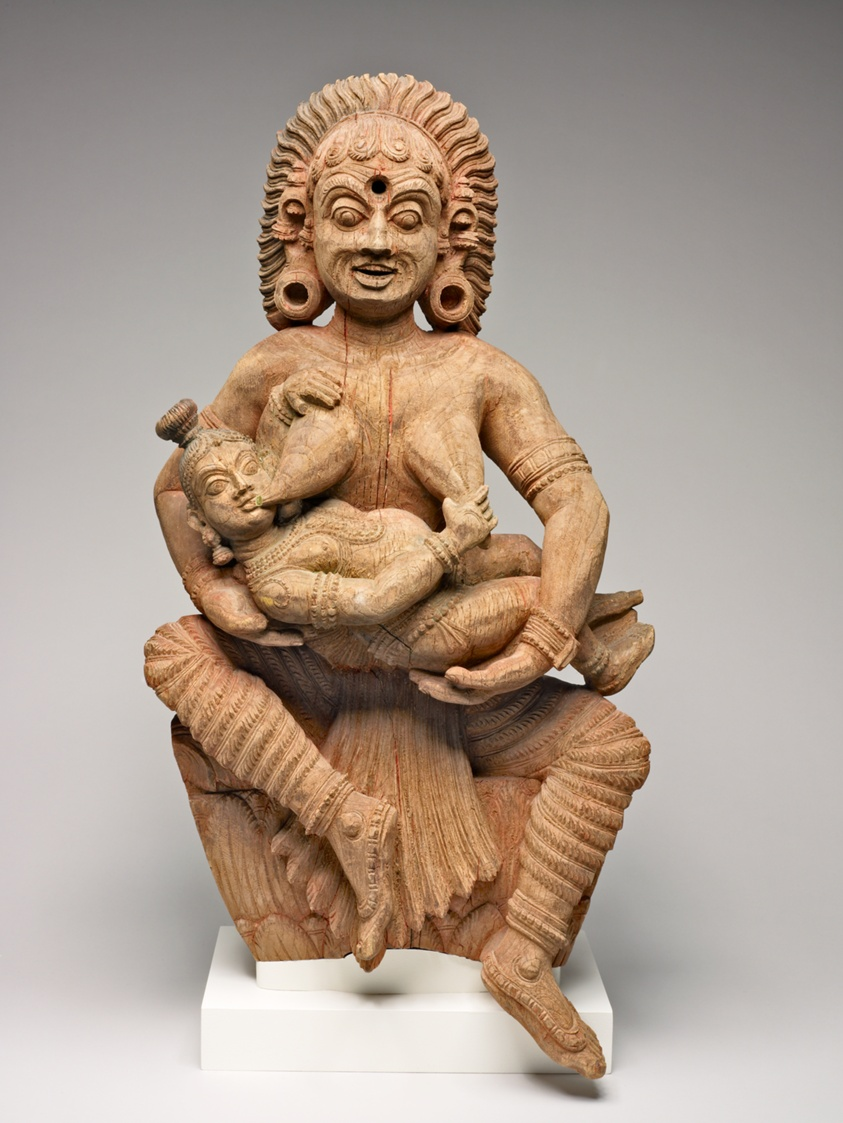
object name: Sculpture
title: The Infant Krishna Killing the Ogress Putana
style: South Asian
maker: India; Kerala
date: 17th century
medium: Wood with traces of red and blue pigments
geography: Kerala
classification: wood; sculpture; asian art